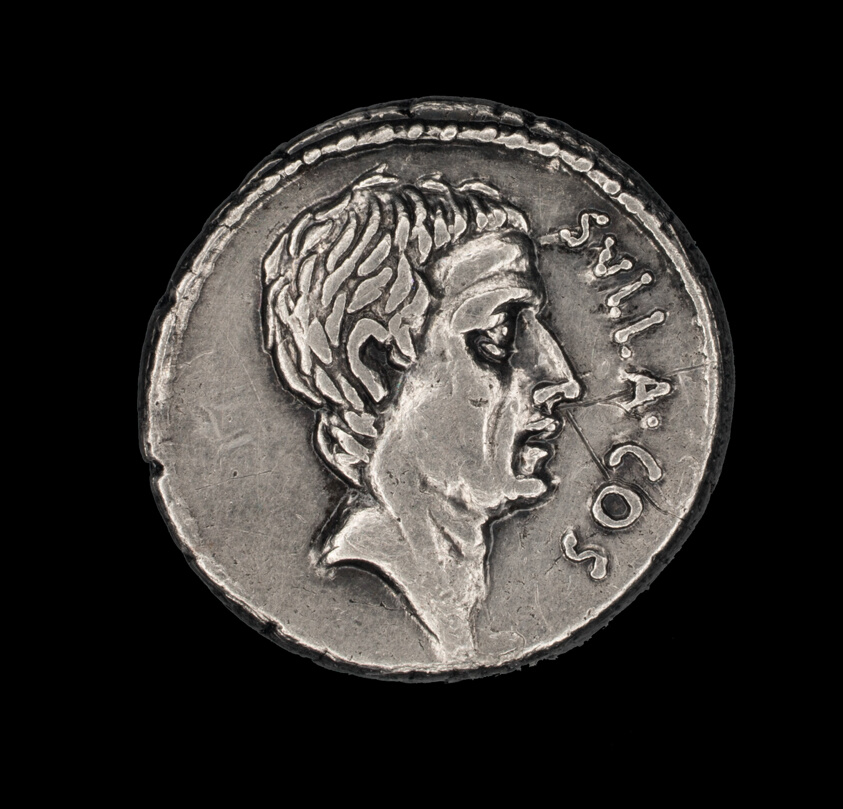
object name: Coin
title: Coin Portraying Q. Pompeius Rufus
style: roman (ancient, style or period), republic period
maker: Roman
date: 54 BCE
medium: Silver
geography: Roman Empire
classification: coin; ancient art